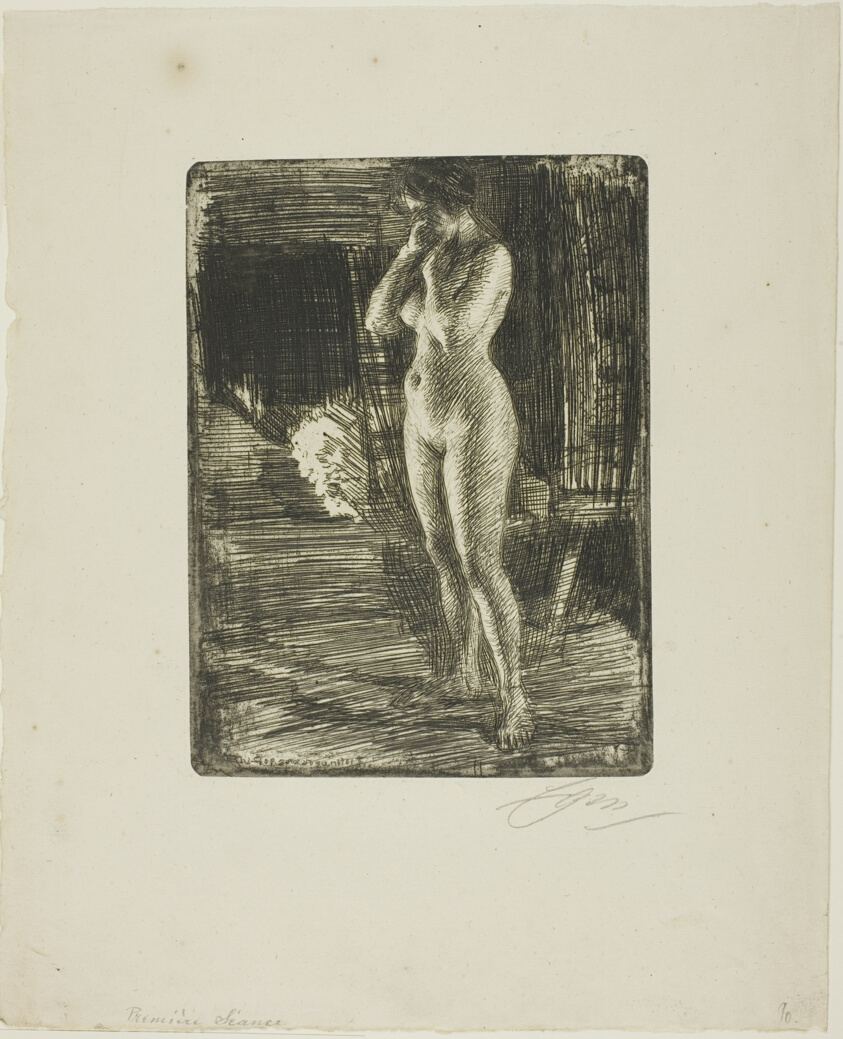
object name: Print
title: The First Pose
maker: Anders Zorn (Swedish, 1860-1920)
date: 1906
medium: Etching on ivory laid paper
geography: Sweden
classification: etching; print; prints and drawing